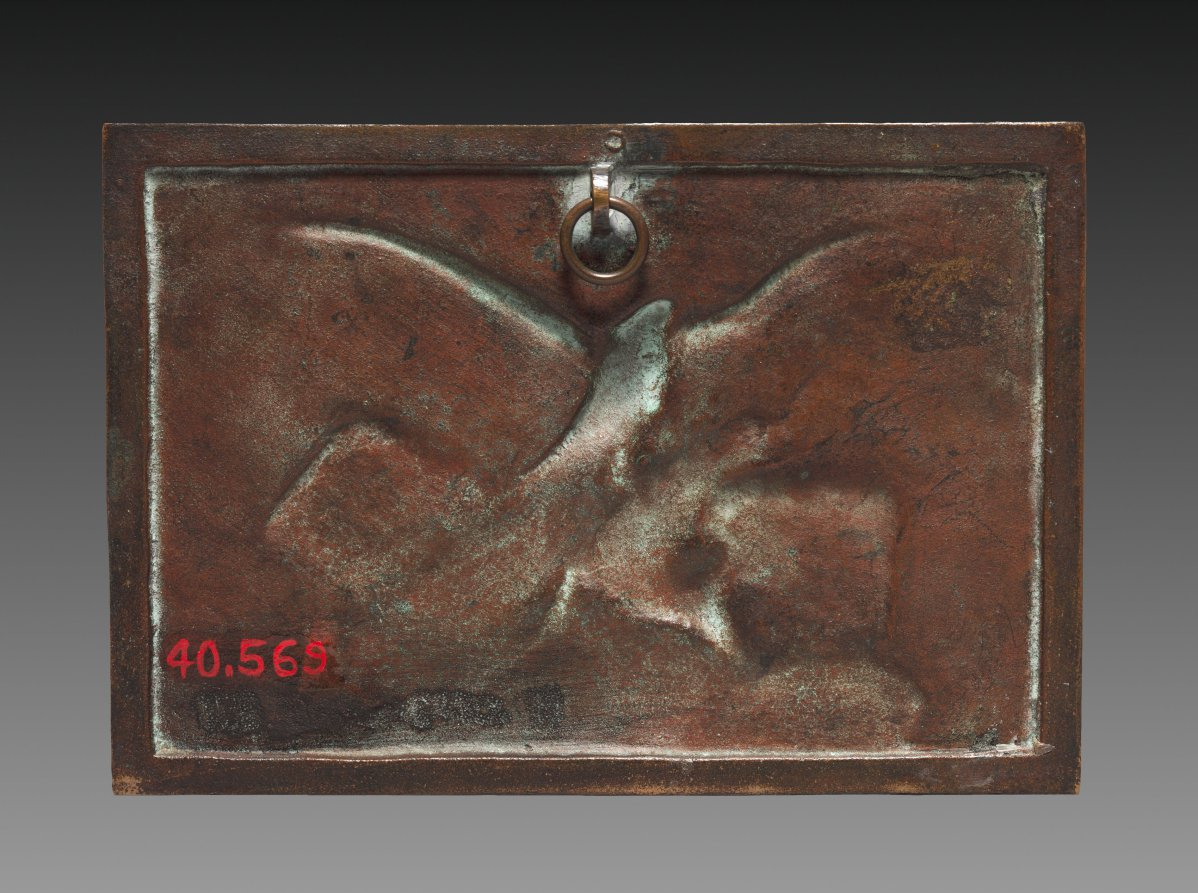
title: Eagle with Chamois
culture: France, 19th century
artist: Antoine-Louis Barye (French, 1796–1875)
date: c. 1830 – 1875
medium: bronze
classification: Sculpture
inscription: Signed: "Barye"